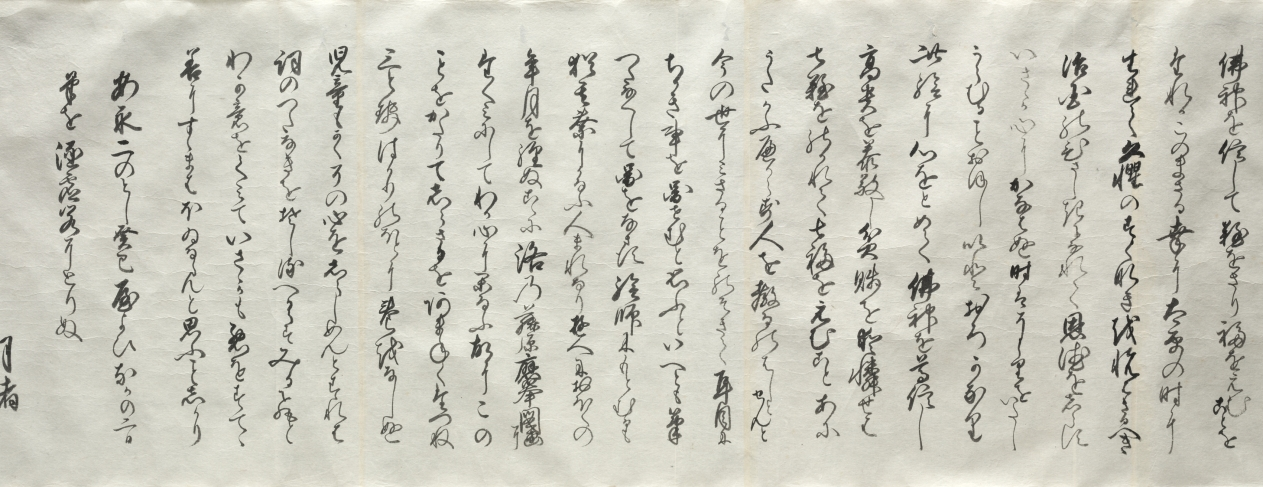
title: Sketch Copy of Natural Disasters, from the Seven Fortunes and Misfortunes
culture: Japan, Edo period (1615–1868) to Meiji period (1868–1912)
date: after 1773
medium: handscroll; ink and color on paper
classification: Painting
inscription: Signed: Gettcho; dated 1773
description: This unmounted handscroll is a copy of the first of a three-scroll set painted by Maruyama Ōkyo (1733–1795) for Buddhist monk Yujō (1723–1773). It depicts people's unfortunate encounters with forces of nature from wind to beasts. Ōkyo's realistic, contemporary imagery was meant to evoke a sense of recognition and empathy in viewers, shocking them into avoidance of possible punishments.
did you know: Notations that appear throughout the scroll indicate colors and other details of the original painting.